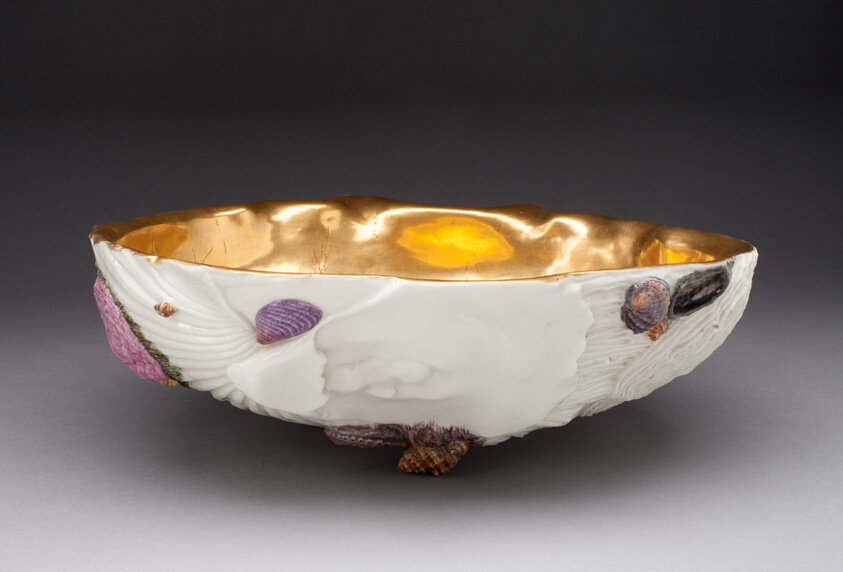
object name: Ceramics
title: Ewer and Basin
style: Rococo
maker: Capodimonte Porcelain Manufactory; Italian, founded 1743; Modeled by Giuseppe Gricci; Italian, c. 1700-1770; Naples, Italy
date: c. 1745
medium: Soft-paste porcelain, polychrome enamels and gilding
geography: Capodimonte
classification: ewer (vessel); porcelain; vessel; european decorative arts; ceramics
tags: seas, shells, coral